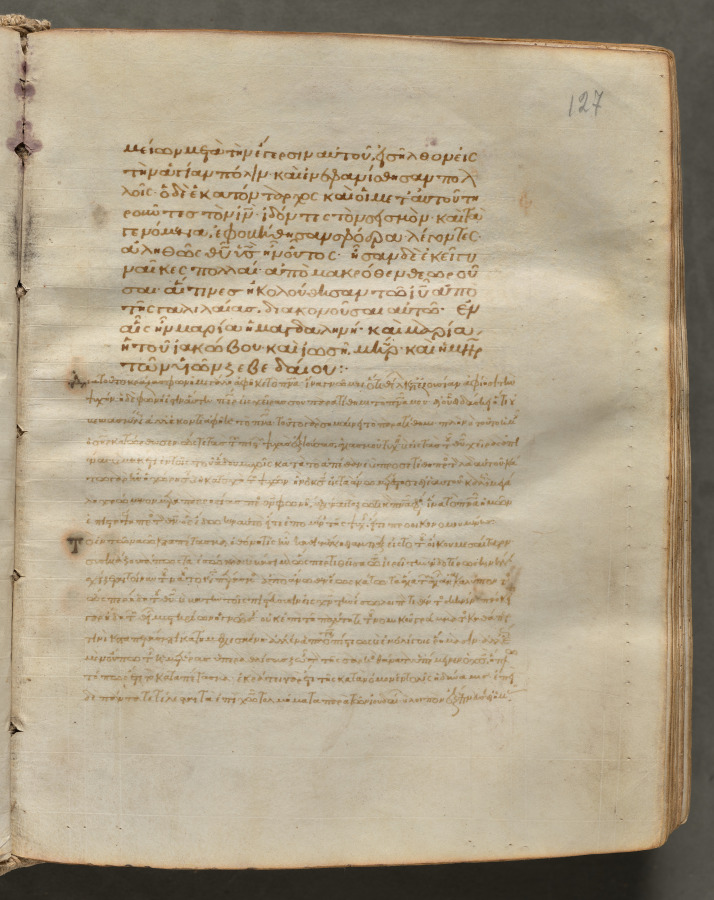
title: Text, folio 127 (recto), from a Gospel Book with Commentaries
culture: Byzantium, Constantinople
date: c. 1000–1100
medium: ink, tempera, and gold on vellum; leather binding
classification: Bound Volume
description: Each of the four gospels in this book opens on a page with brilliantly illuminated borders depicting the author of the text as well as birds-principally peacocks, symbols of the immortality of the soul-and fountains, representing the fountain of life and the salvation of the soul. This volume consists of 428 leaves with texts in Greek. Its level of sophistication suggests that it was probably written and decorated in a monastery in Constantinople.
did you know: Gospel Books were carried in procession through Byzantine churches.